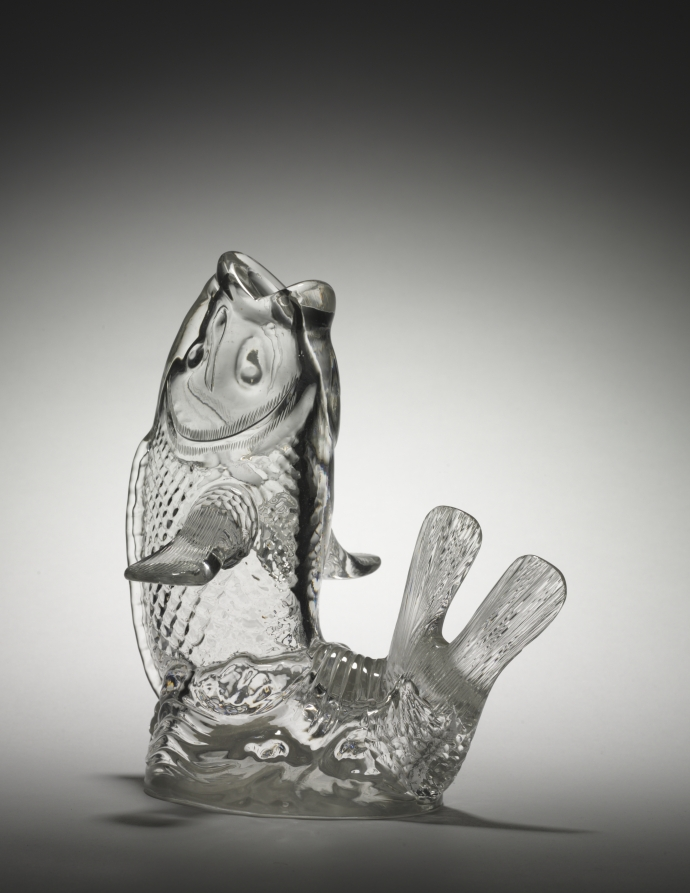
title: Fish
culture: France, 19th century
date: c. 1880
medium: glass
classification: Glass